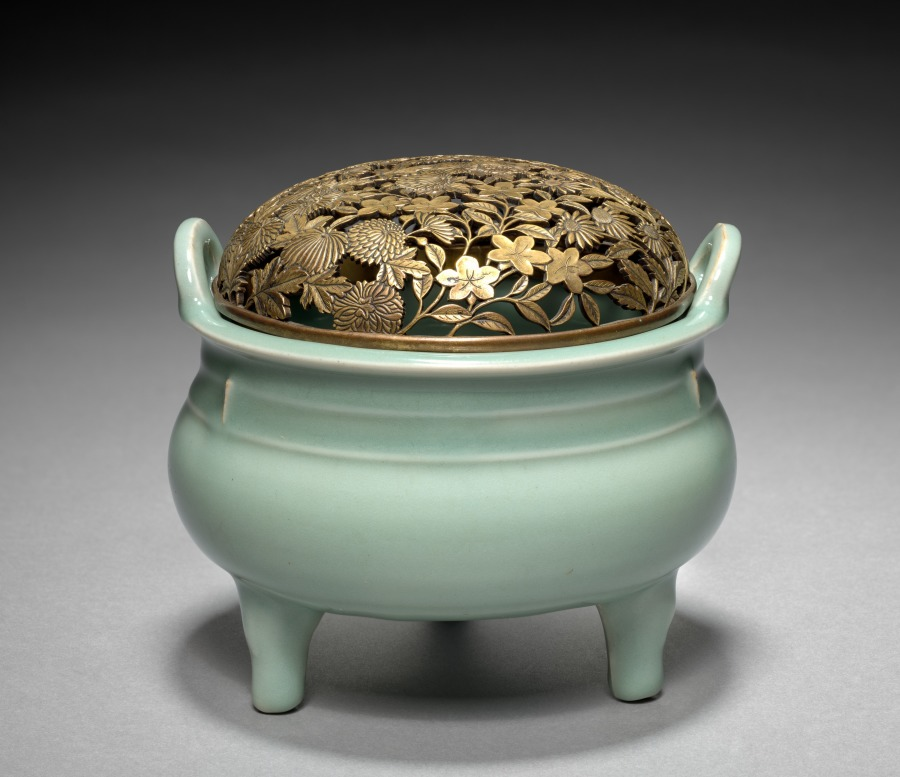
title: Covered Incense Burner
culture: Japan, Meiji period (1868–1912)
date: late 1800s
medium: Porcelain with gilt bronze cover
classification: Ceramic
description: This incense burner emulates Chinese porcelain in its glaze and form. A number of prominent Meiji-period ceramicists explored classical Chinese forms and glazes even as they also produced stoneware with Japanese-style glazes.